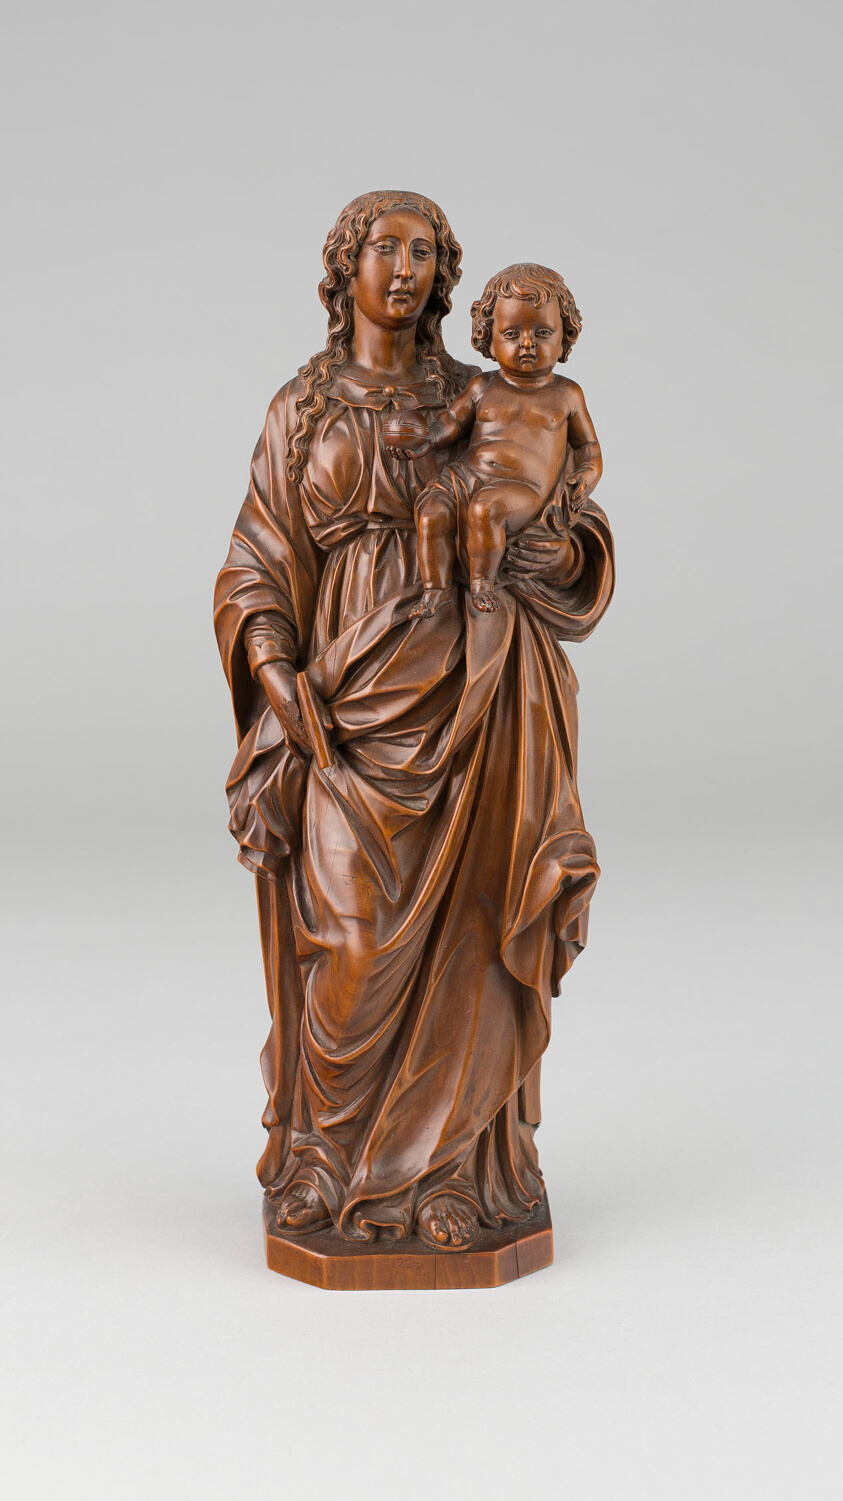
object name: Sculpture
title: Virgin and Child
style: 18th Century, Flemish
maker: Flemish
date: c. 1700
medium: Boxwood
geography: Flanders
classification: statuette; sculpture; flemish; sculpture/wood; wood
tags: Virgin and child/Madonna and child, religious figures, religious, religion, Christianity, Christian subjects, woman with children, sons, woman, child, mother, mother and child, Jesus, Virgin Mary